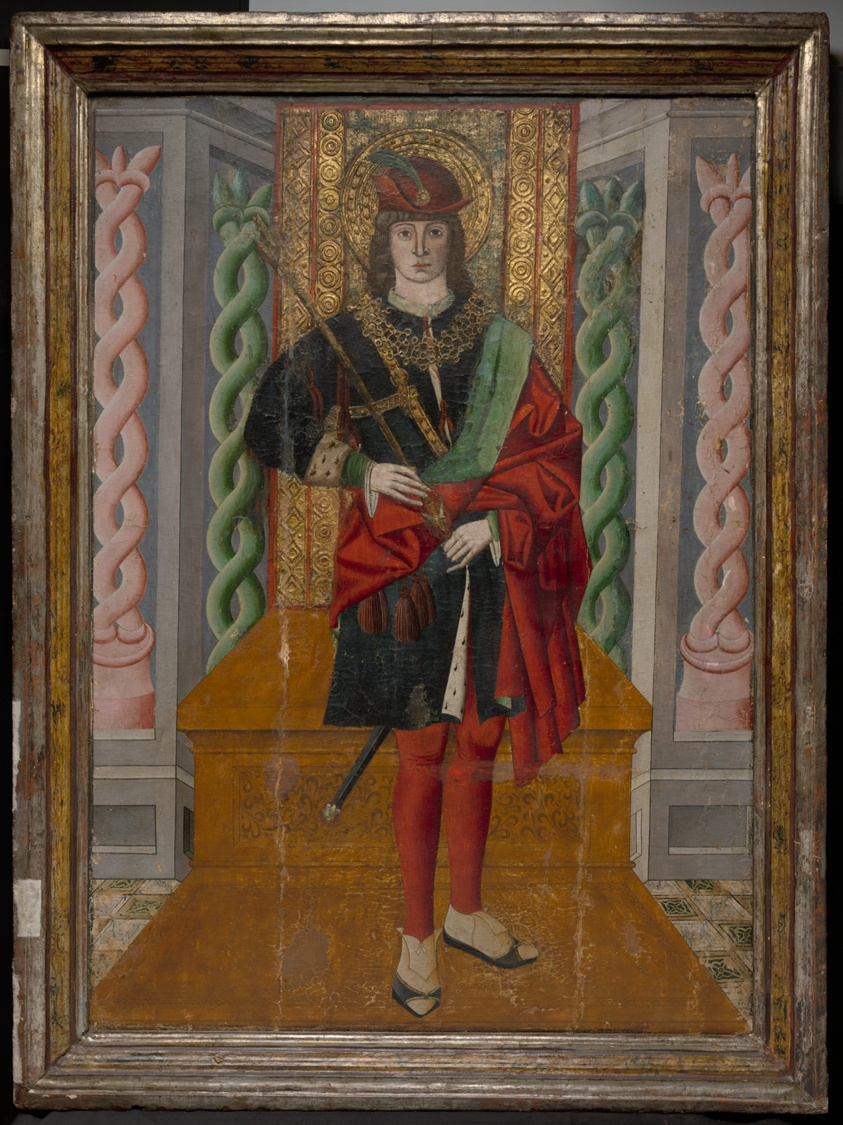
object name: Painting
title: Saint Sebastian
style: 15th century, 16th Century, sixteenth century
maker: Spanish; Catalonia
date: 1490/1500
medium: Tempera on panel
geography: Catalonia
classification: tempera; paint; spanish; painting; european painting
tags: saints, arrow, Christian subjects, Christianity, feathers, hat, interior, jewelry, man, red (color), religion, religious, religious figures, soldiers, swords